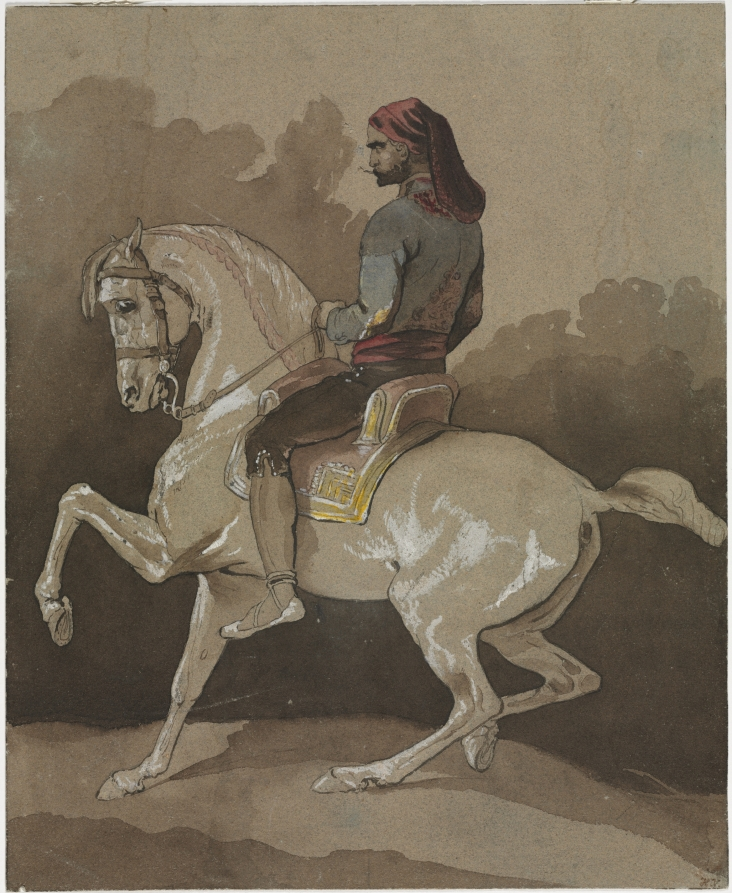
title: Arab on Horseback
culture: France, 19th century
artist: Horace Vernet (French, 1789–1863)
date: 1800s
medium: watercolor heightened with white gouache with graphite underdrawing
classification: Drawing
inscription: Inscribed, lower right, in brown ink: H.V.